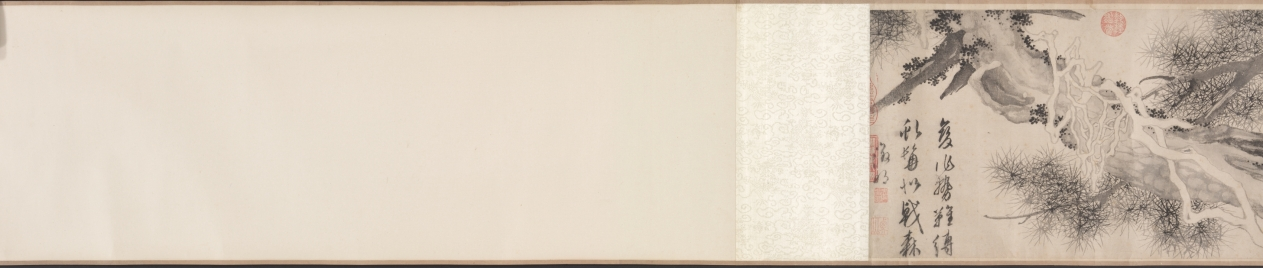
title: Old Pine Tree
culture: China, Ming dynasty (1368–1644)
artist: Wen Zhengming (Chinese, 1470–1559)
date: late 1530s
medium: handscroll; ink on paper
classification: Painting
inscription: 變化勢難縛，虬髯似戟森. 徵明 [印]文徵明印; 衡山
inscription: 2 partial seals of Qian Shisheng 錢士昇 (1575–1652)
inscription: 8 imperial seals: 6 of the Qianlong emperor (r. 1736–95); 1 of the Jiaqing emperor (r. 1796–1821); 1 of the Xuantong emperor (r. 1909–11).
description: Here the natural appearance of a gnarled and vine-entangled pine has been transformed into a rhythmic abstraction of brushstrokes and ink tonalities, with unifying opposites—opening and closing, rising and falling—that provide the design across the horizontal scroll. The artist's inscription reads: "The force of change beyond restraint; / The dragon's whiskers are likened to a forest of spears."